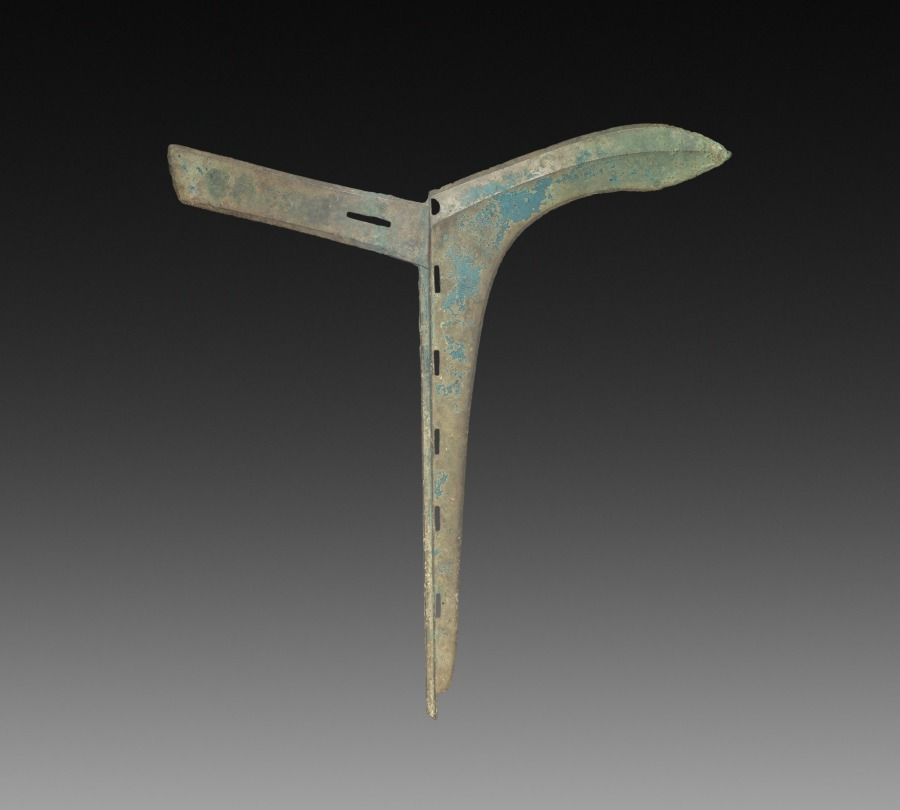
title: K'o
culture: China, Zhou dynasty (c. 1046–256 BCE)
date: 1045–256 BCE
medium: bronze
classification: Arms and Armor